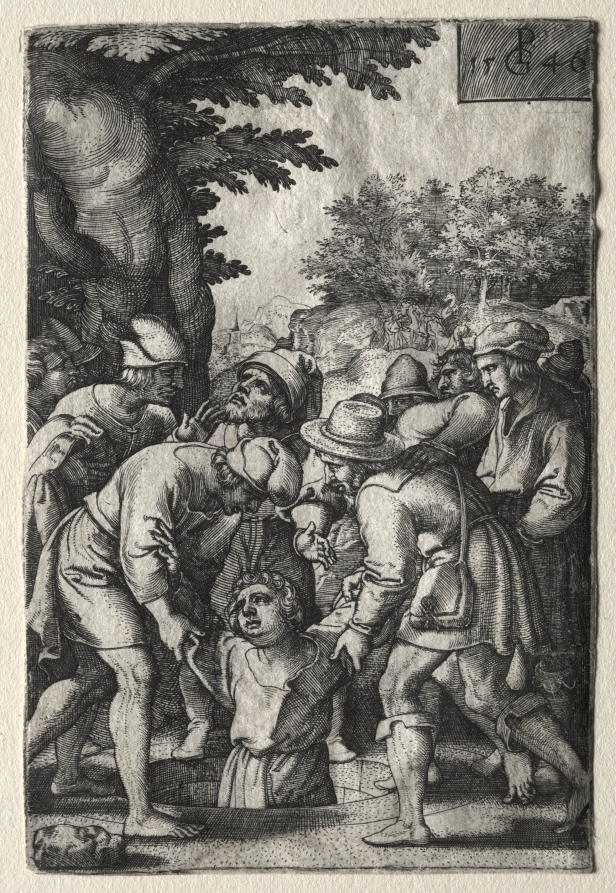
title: Joseph Lowered into a Well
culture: Germany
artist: Georg Pencz (German, c. 1500–1550)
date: 1546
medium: engraving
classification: Print